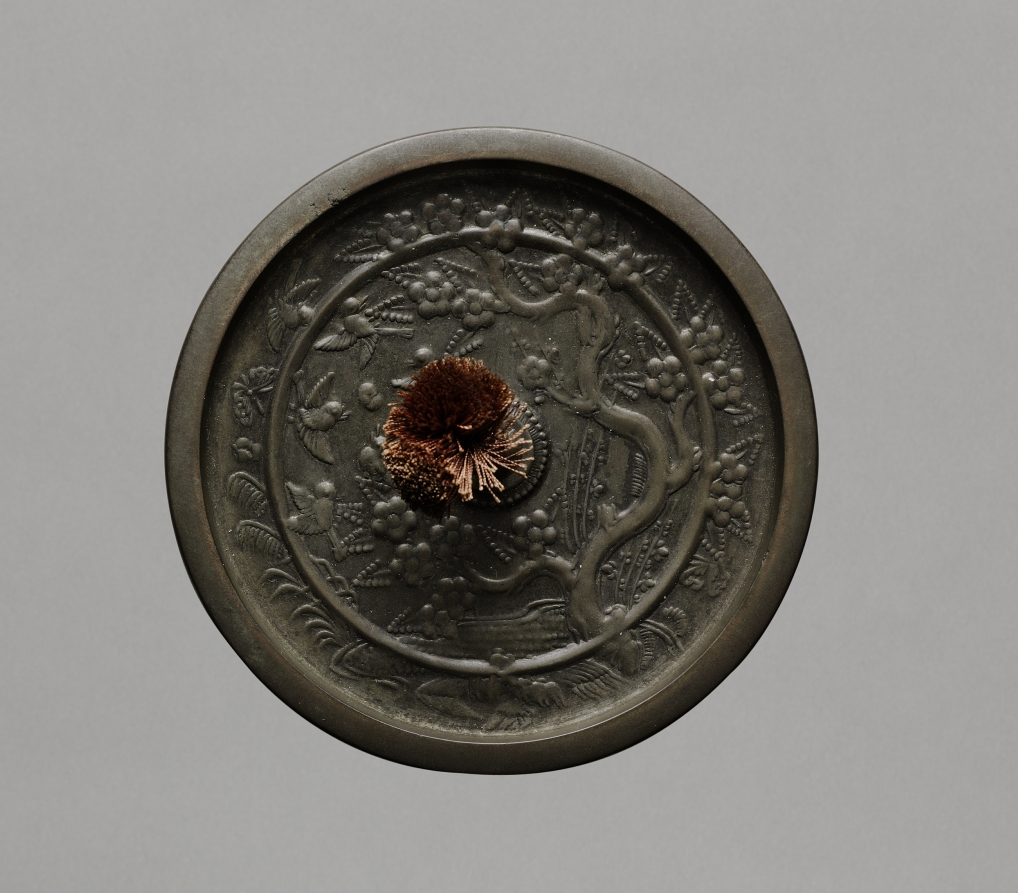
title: Mirror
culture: Japan, Kamakura period (1185–1333)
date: 1185–1333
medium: bronze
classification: Metalwork